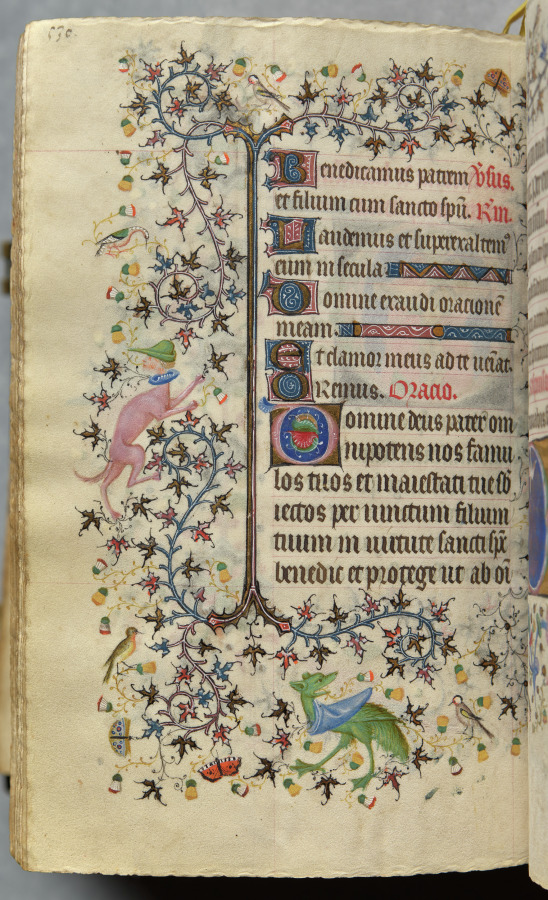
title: Hours of Charles the Noble, King of Navarre (1361-1425): fol. 259v, Text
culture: France, Paris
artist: Master of the Brussels Initials and Associates (French)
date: c. 1405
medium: ink, tempera, and gold on vellum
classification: Bound Volume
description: This precious volume was obviously highly prized by its owner, the French-born King of Navarre, who had his coat of arms painted on no less than twenty folios. Rather than directly commissioning this manuscript from a specific workshop, it seems that Charles the Noble acquired his book of hours -- perhaps ready-made for the luxury market -- while on a trip to Paris in 1404-05. A collaborative effort, six painting styles are evidenced within the pages of this codex, those of two Italians, two Frenchmen, and two Netherlanders. The painter who was responsible for the planning and decoration of the book, and who produced seventeen of the large miniatures, was a Bolognese artist known as the Master of the Brussels Initials. His principal assistant, responsible for most of the borders, was a Florentine who signed his name "Zecho" da Firenze on folio 208 verso.